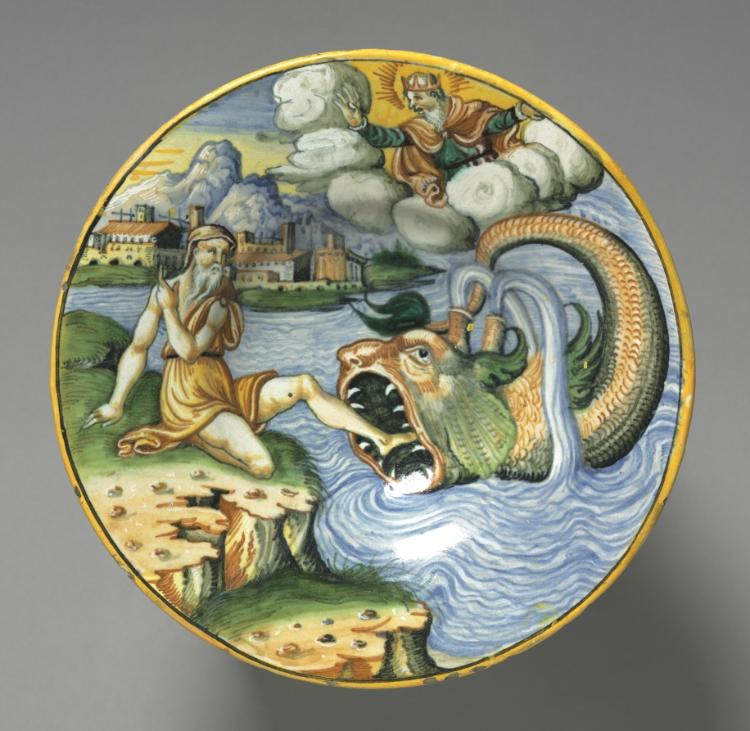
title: Plate Depicting Jonah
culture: France, Lyon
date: late 1500s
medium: tin-glazed earthenware (maiolica)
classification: Ceramic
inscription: inscribed on reverse: IONAS II/&III.